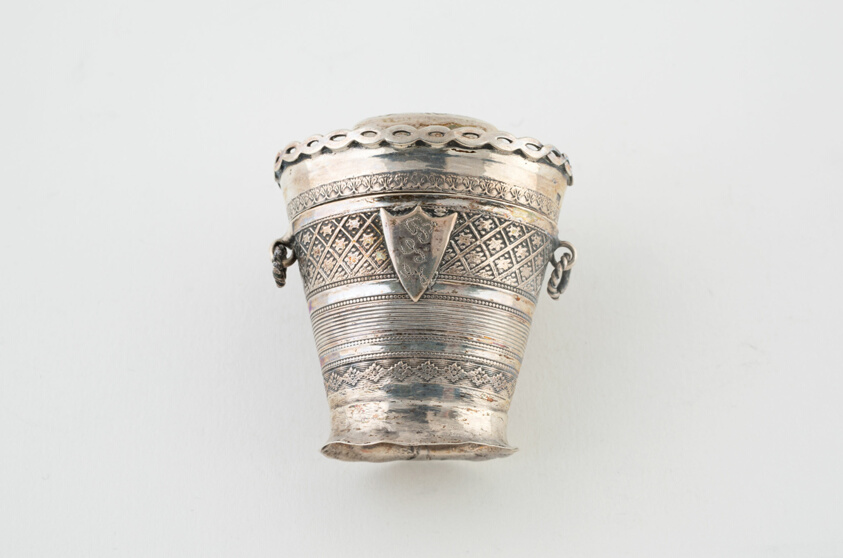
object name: Metalwork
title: Sponge Box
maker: Netherlands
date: 1857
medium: Silver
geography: Netherlands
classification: container for personal use; box; european decorative arts; metalwork; silver; decorative object/ornament